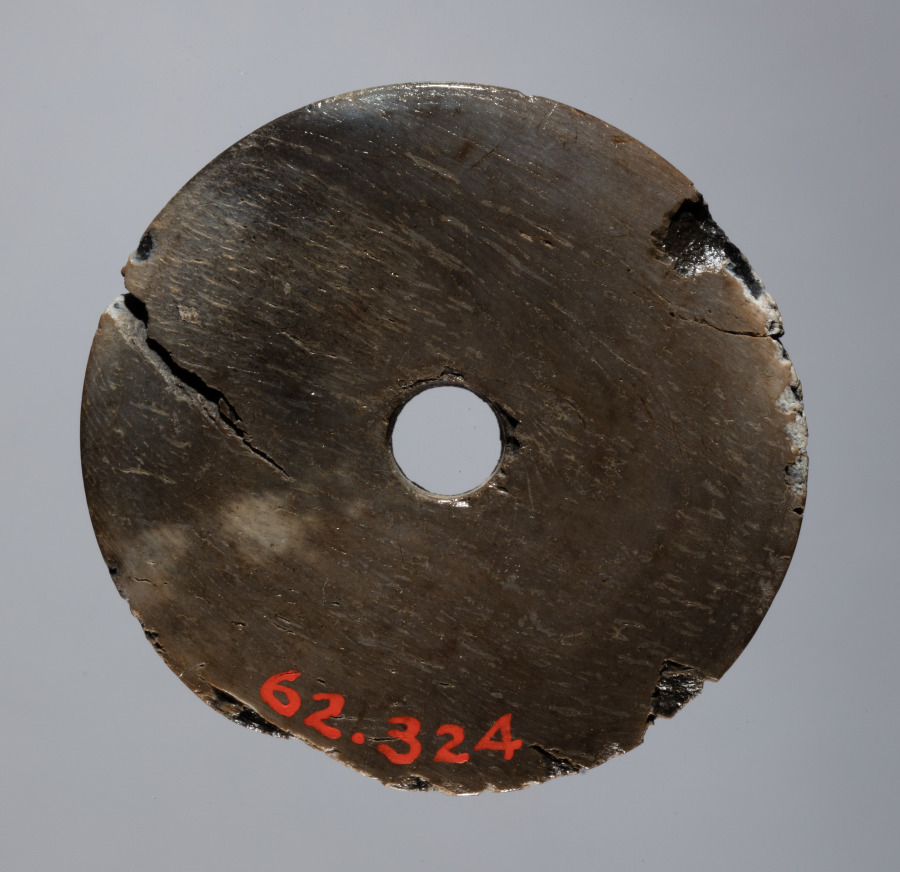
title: Spindle Whorl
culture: Iran, early Islamic period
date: 700s - 900s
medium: bone, incised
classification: Spindle Whorl